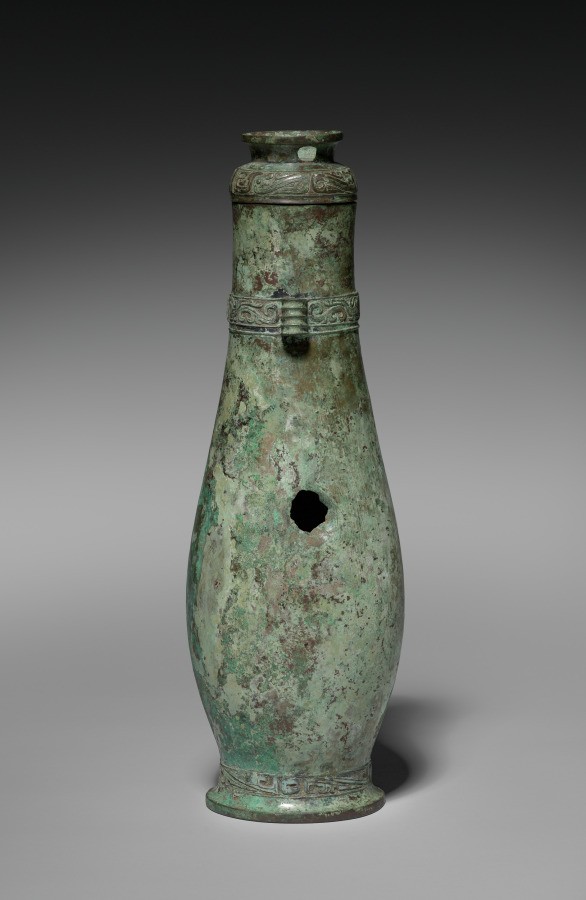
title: Wine Vessel (Hu)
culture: China, Western Zhou dynasty (c. 1046–771 BCE)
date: c. 1000–900 BCE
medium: bronze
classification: Metalwork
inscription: inscription inside top (cup): 事从作壺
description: This tall, slender bronze wine vessel, called a hu, has three bands of ornamentation: one above the foot, one around the neck, and one on the cover. Stylized birds or phoenixes are in the band around the neck, while the band on the cover and foot feature geometric dragons. The dragon and the phoenix may represent yin and yang and would be equally appropriate on a bronze of either secular or religious purposes. When inverted, the cover forms a cup. It likely held liquids like wine at festive banquets or religious ceremonies. The cylindrical "handles" at the neck band suggest that the vessel was carried by a cord.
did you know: This vessel was cast by the cire perdue, or lost wax, process.